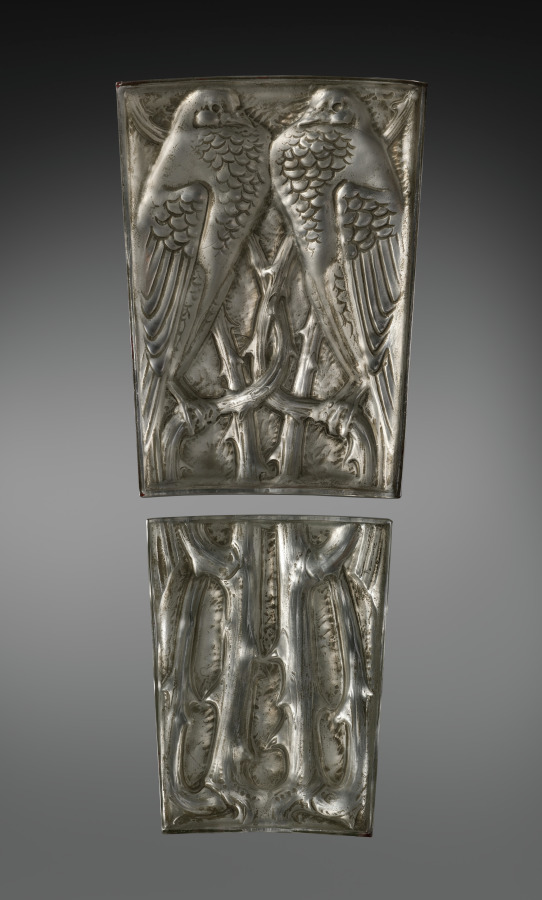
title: Two Pigeons Panels (Panneaux deux pigeons)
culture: France, 20th century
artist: René Lalique (French, 1860–1945)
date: 1914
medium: molded glass with mirrored backplate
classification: Glass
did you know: The title of this work translates to curved panels with two pigeons.